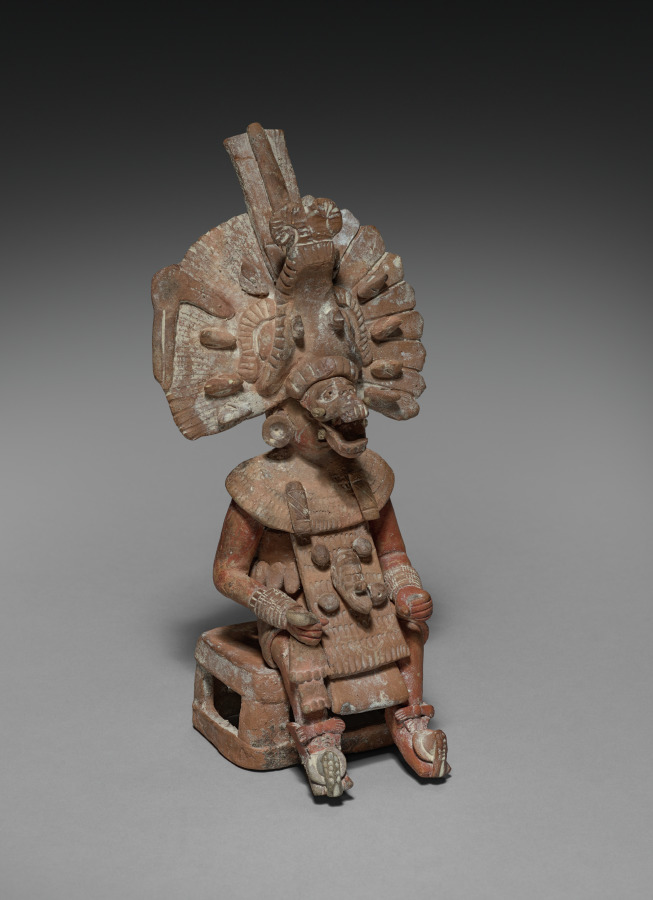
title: Seated Lord with Removable Headdress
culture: Mesoamerica, Maya, probably Jaina Island, Late Classical period, 7th-9th century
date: 600–800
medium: ceramic and slip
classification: Ceramic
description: The major Maya grave offerings on Jaina Island were ceramic figurines that depict deities and humans in a variety of roles. The standing figure represents a warrior who once probably held weapons and wears either quilted cotton armor or the feathered uniform of a military order. The seated figure also represents a male, perhaps another warrior, who wears a huge zoomorphic headdress. A skeletal face with articulated jaw descends from the headdress to fit as a mask over the figure’s face.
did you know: It is estimated that some 20,000 people were buried on the tiny island of Jaina over a 500-year period.